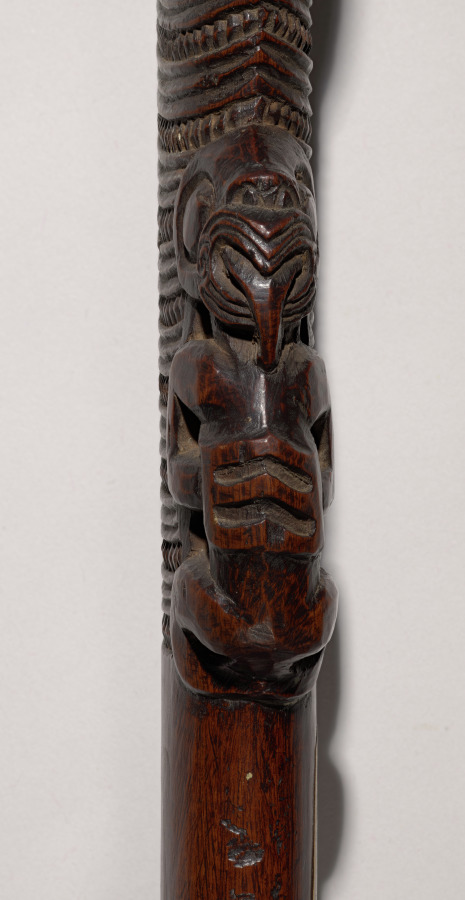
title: Short Club (Wahaika)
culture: Polynesia, New Zealand, Maori people, mid-19th Century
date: mid 1800s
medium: wood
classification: Sculpture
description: The wahaika, carried in a belt, was used by the Maori in hand-to-hand combat. Early, undecorated clubs were made of stone. Bone and wood clubs were decorated with increasingly complex carved designs. The small figure clinging to the side of this club may well represent the supernatural power (mana) of the weapon, while the face at the end of the grip expresses the aggression of combat.